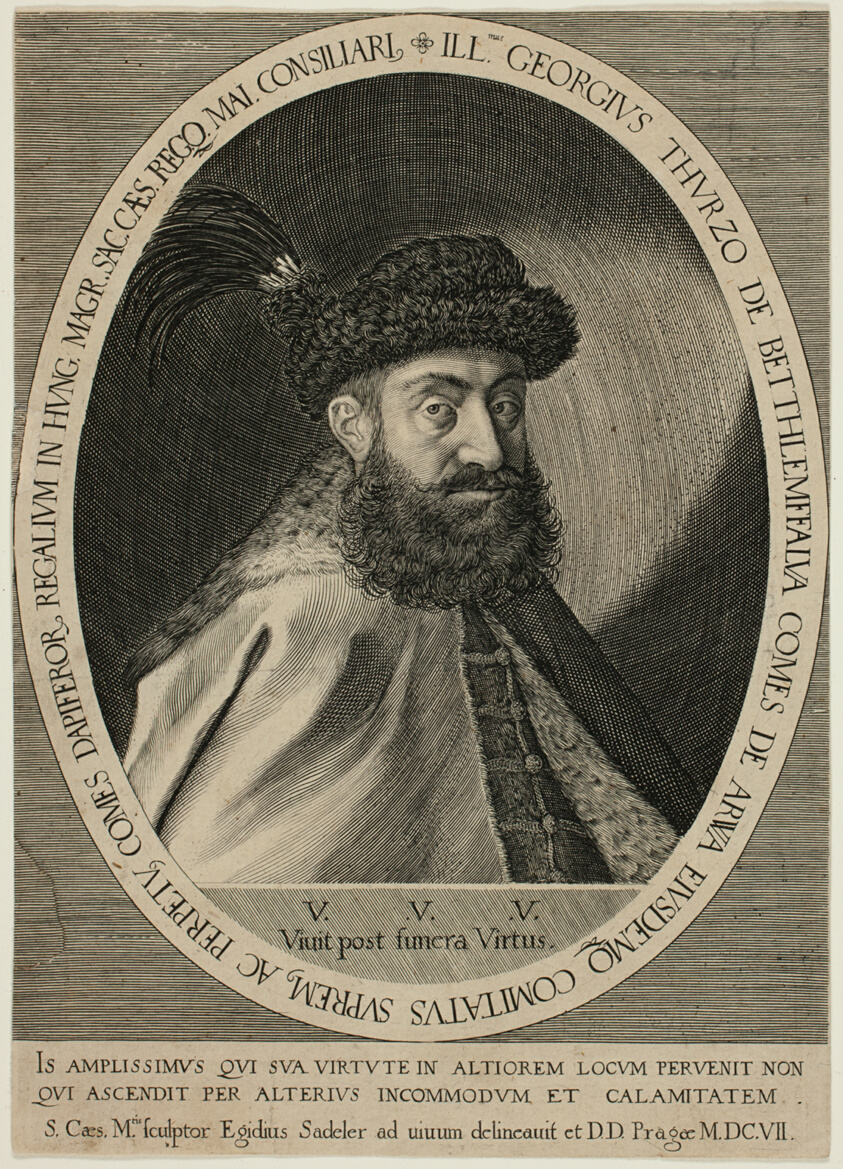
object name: Print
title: Georg III Thurzo of Bethlendorf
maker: Aegidius Sadeler; Flemish, 1570-1629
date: 1607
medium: Engraving and etching in black on cream laid paper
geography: Flanders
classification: etching; print; prints and drawing